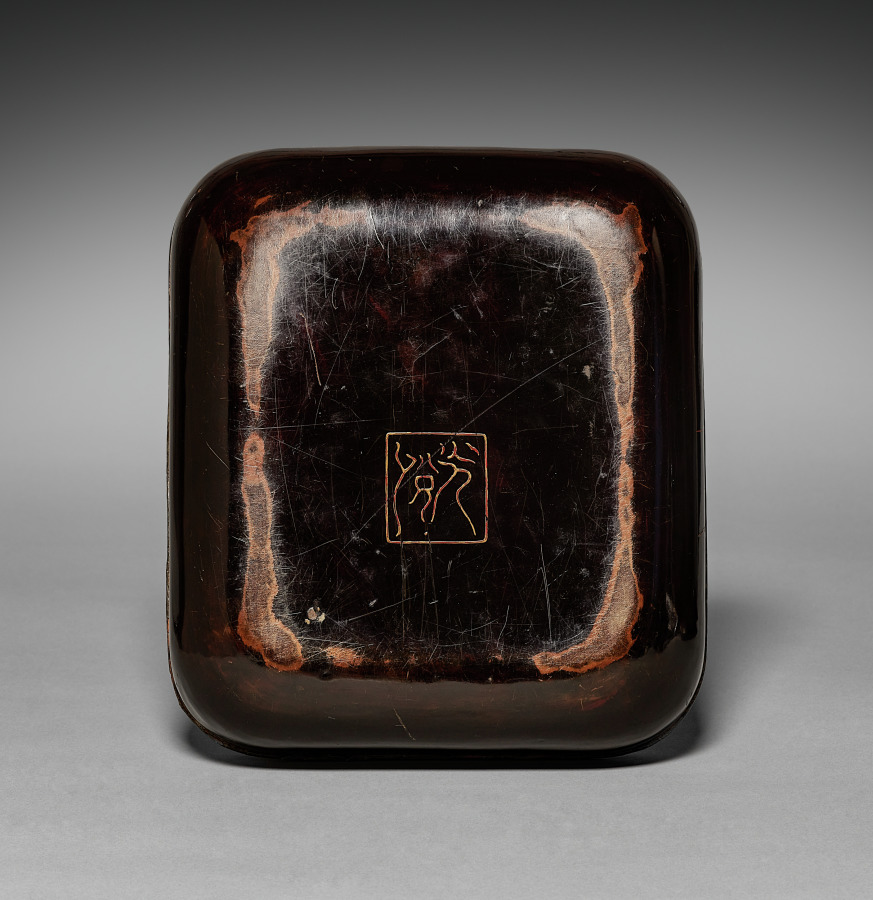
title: Letter Box (base)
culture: Japan, Edo period (1615–1868)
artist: manner of Ogata Kōrin (Japanese, 1658–1716)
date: 1700s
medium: lacquer with pewter and mother-of-pearl inlay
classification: Lacquer